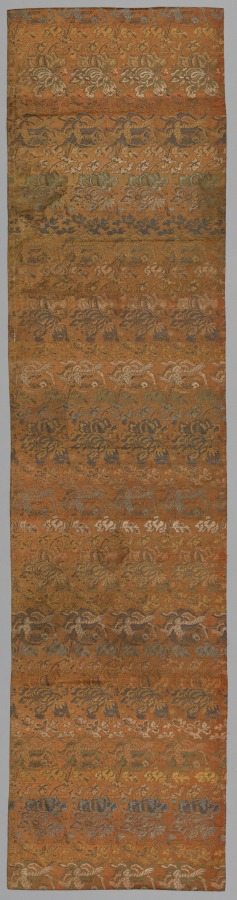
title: Silk Textile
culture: Japan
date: 19th century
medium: silk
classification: Textile